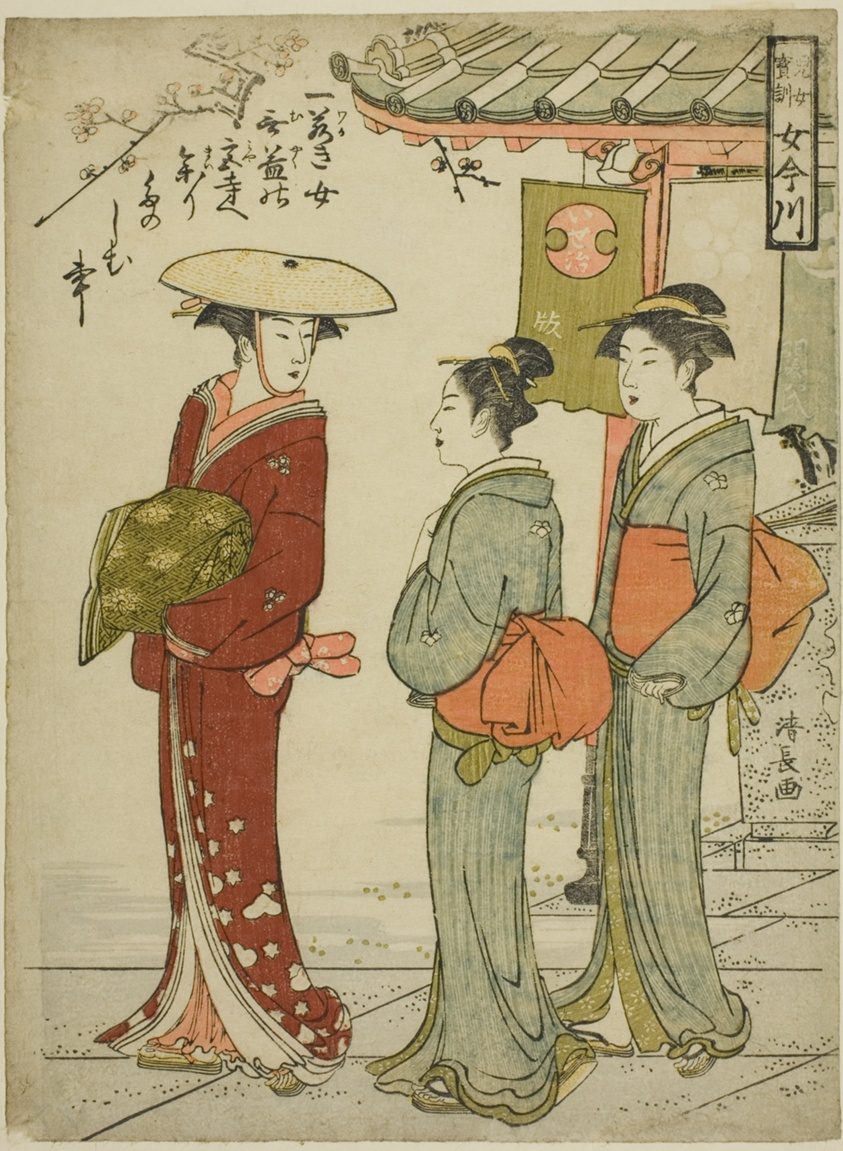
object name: Print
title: Treasured Admonitions to Young Women (Jijo hokun onna Imagawa)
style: Japanese (culture or style)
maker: Torii Kiyonaga (Japanese, 1752-1815)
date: c. 1784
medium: Color woodblock print; chuban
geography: Japan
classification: woodblock print; print; asian art